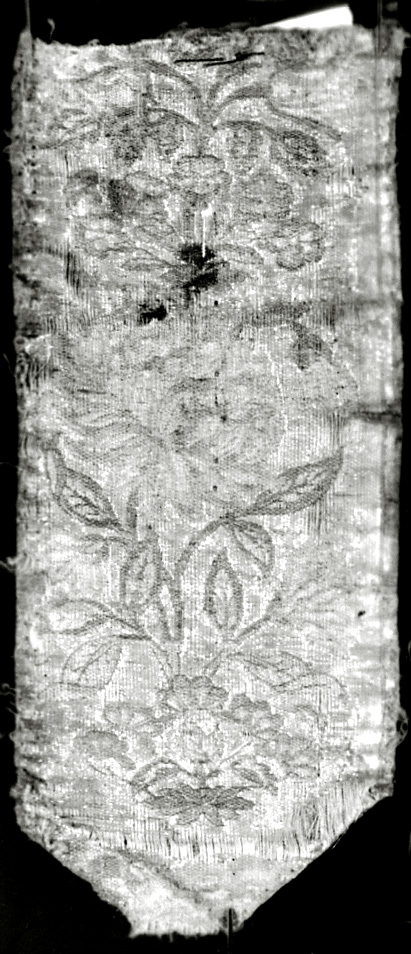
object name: Textile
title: Fragment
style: kashan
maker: Iran (Persia, Kashan)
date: 18th century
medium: Plain compound cloth, silk and gold in narrow metal strips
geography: Iran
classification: textile; weaving